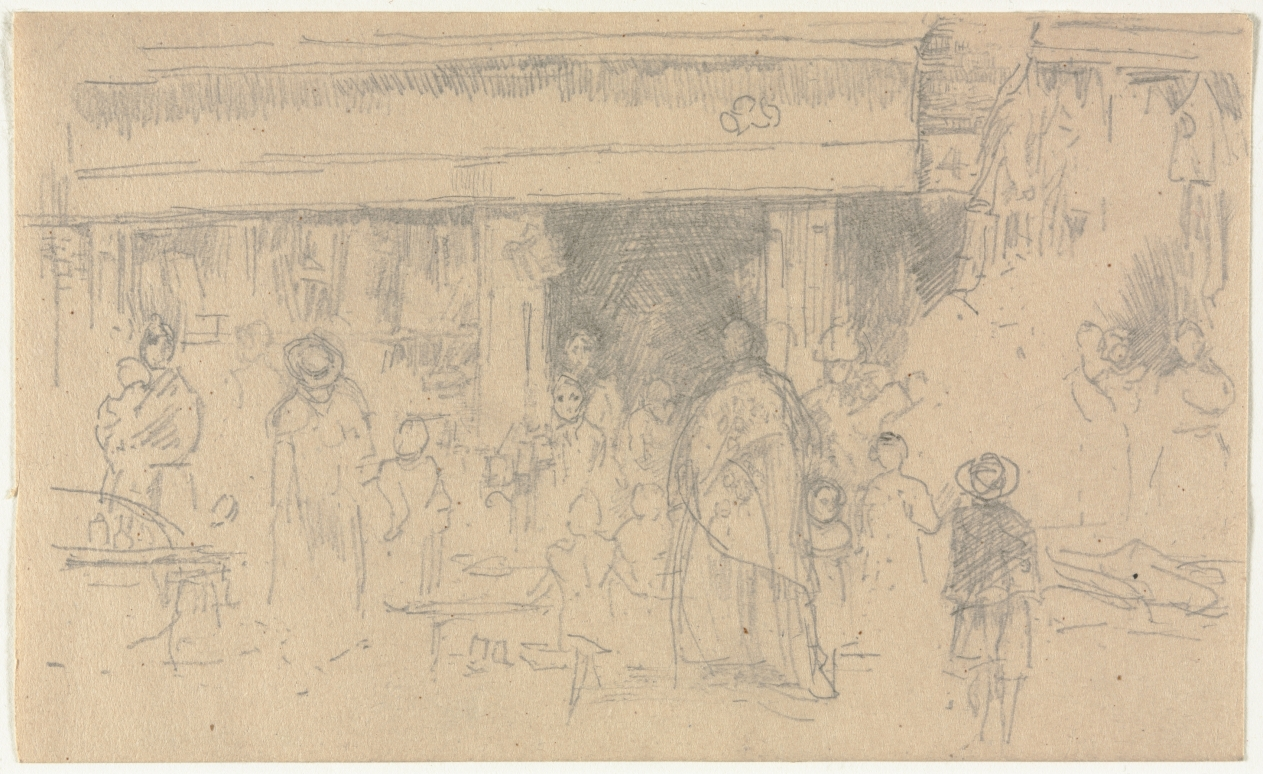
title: Street Scene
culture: America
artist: James McNeill Whistler (American, 1834–1903)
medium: pencil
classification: Drawing